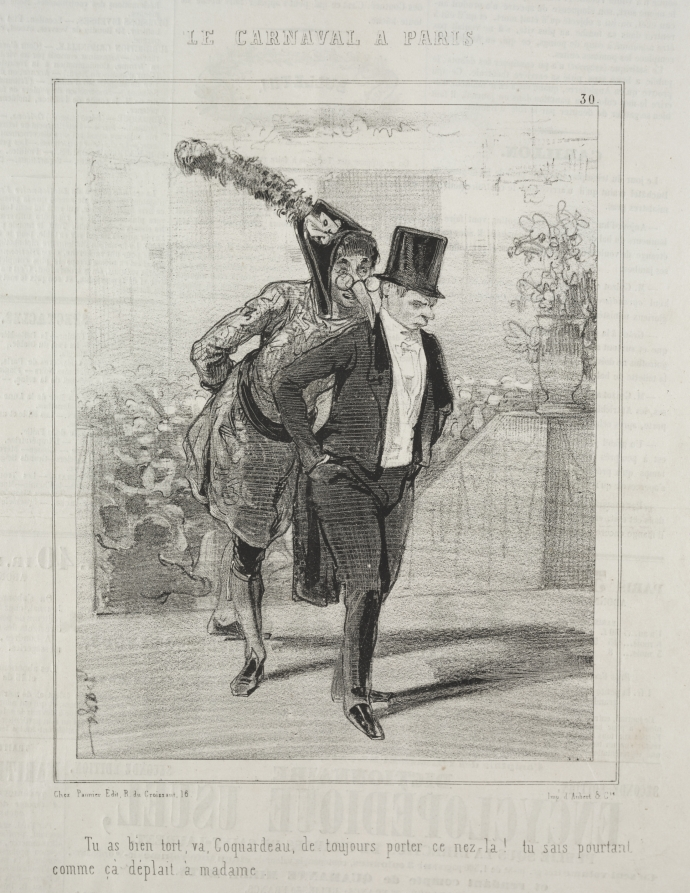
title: Carnaval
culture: France, 19th century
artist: Paul Gavarni (French, 1804–1866)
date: 1841–1843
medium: lithograph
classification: Print